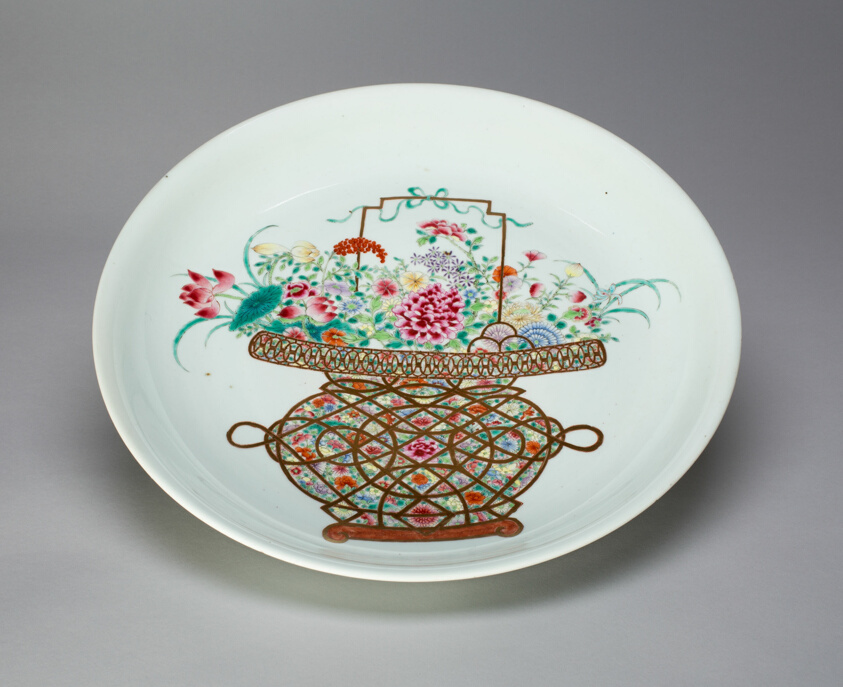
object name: Vessel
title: Famille-Rose 'Flower Basket' Dish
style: Chinese (culture or style)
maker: China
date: Qing dynasty (1644–1911), 18th century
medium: Porcelain painted in overglaze enamels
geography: China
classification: vase; porcelain; vessel; asian art; ceramics